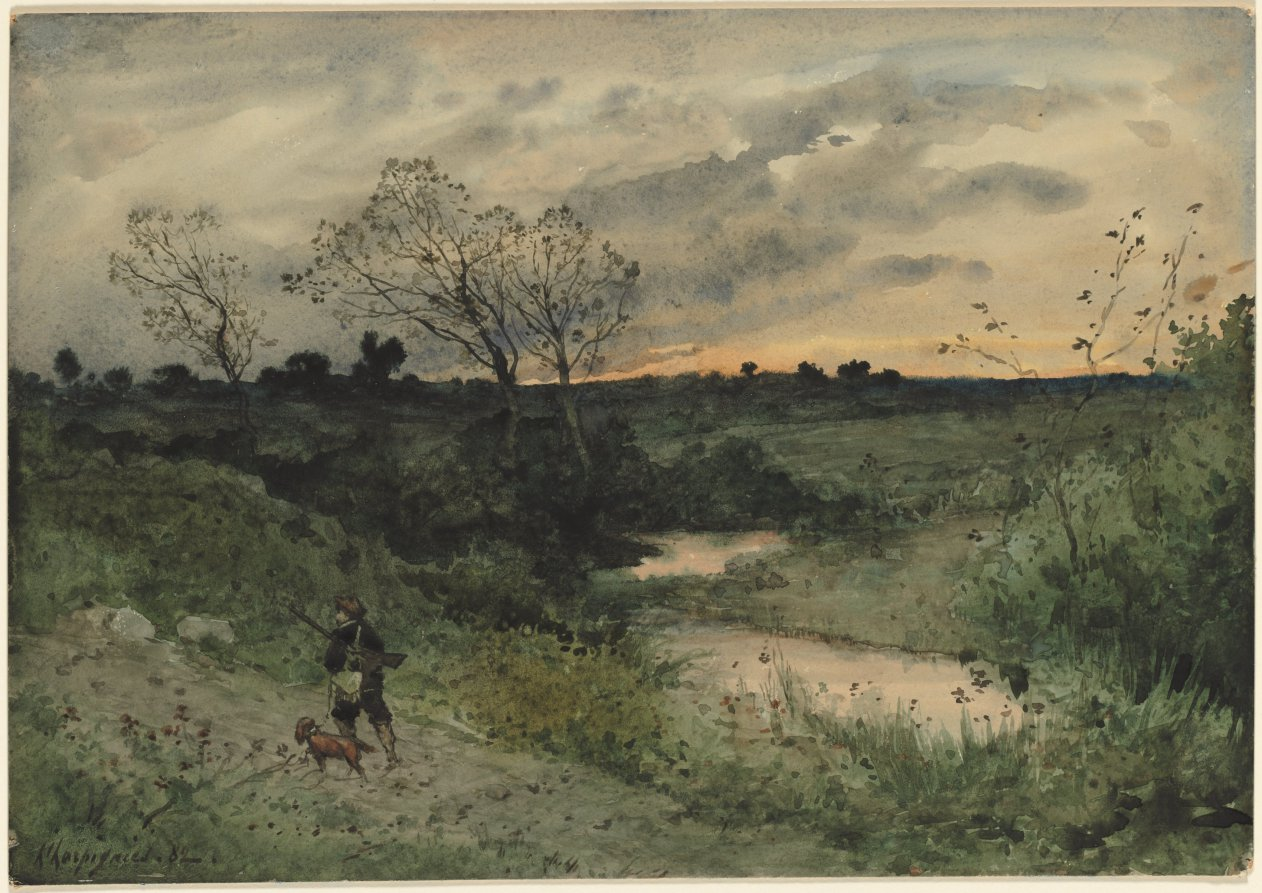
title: Dawn—Hunter with Dog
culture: France, 19th century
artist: Henri Joseph Harpignies (French, 1819–1916)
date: 1882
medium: watercolor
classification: Drawing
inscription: signed, lower left, in black watercolor: h'harpignies . 82.; verso of secondary support, upper center, in graphite: 722 [circled]; lower left, in graphite: 539 [circled]; lower right, in graphite: Gold Whistler / 539 Anderson; lower right, in graphite: a.21708.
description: Created at the height of Henri Harpignies's career, this large watercolor landscape features the artist's characteristic gray-green palette. Harpignies developed the composition using overlapping planes unified by a meandering stream or road. It is impossible to identify the exact setting of the image, which instead was likely meant as a souvenir of the French countryside Harpignies knew well and represented often.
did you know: The figure seen in this drawing was typical of Henri Harpignies's watercolors, which often featured hunters, fishermen, hikers, and sometimes artists.